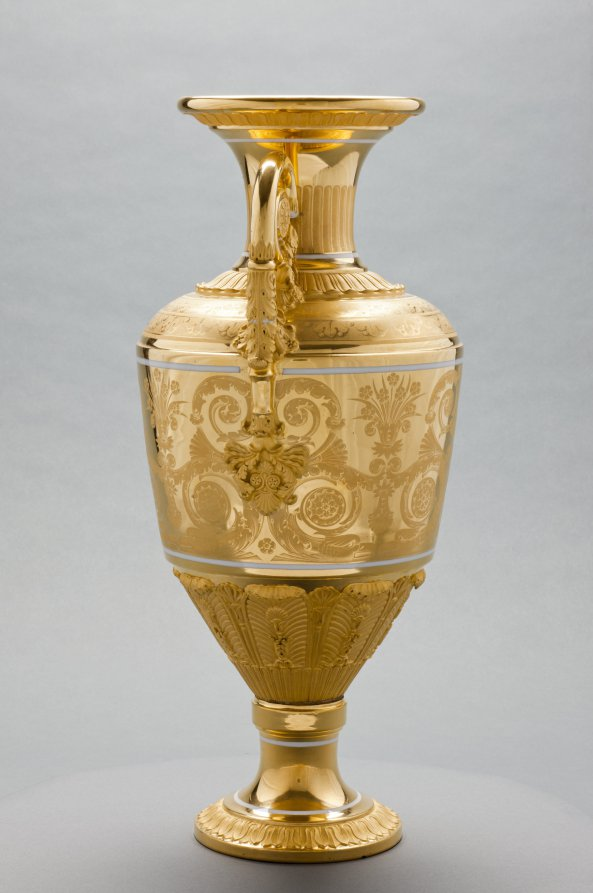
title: Vase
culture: Russia, St. Petersburg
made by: St. Petersburg Imperial Porcelain Factory (Russian)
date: c. 1820–1830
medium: gilt porcelain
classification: Ceramic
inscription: inscribed: "Moreau" in gold near lip.